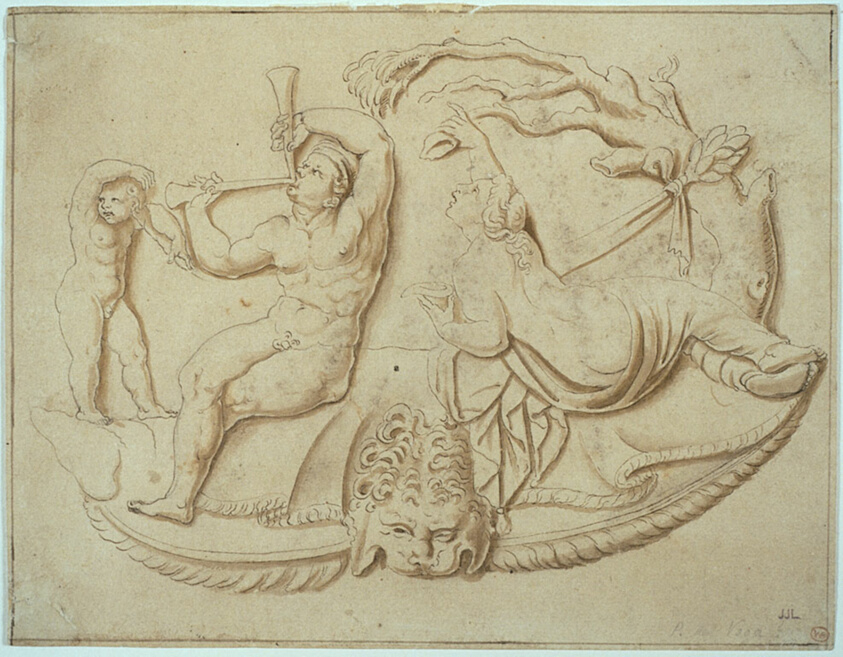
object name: Drawing and Watercolor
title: Satyr with Two Pipes and Putto and Woman Taking Drink from Tree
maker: After Guilio Romano; Italian, c. 1499-1546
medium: Pen and black ink, with brush and brown wash and traces of black chalk, on tan laid paper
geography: Italy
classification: ink with wash; drawings (visual works); prints and drawing